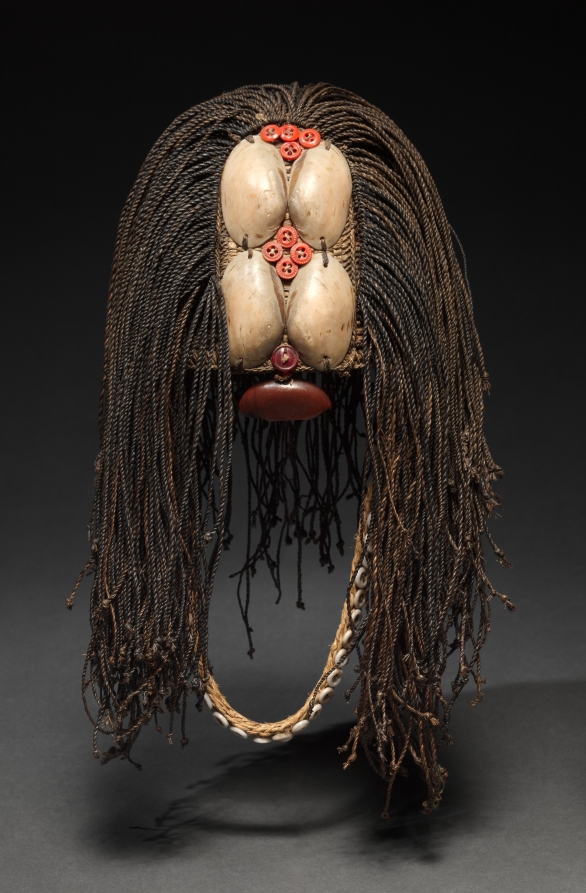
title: Man's Bwami Prestige Cap (sawamazembe)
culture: Africa, Central Africa, Democratic Republic of Congo, Lega-style maker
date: early to mid-1900s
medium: Plant fiber, seashells, seeds, pods, buttons, and probably cotton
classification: Garment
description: Among the Lega people of the eastern Democratric Republic of Congo, headgear was an important indicator of social position. Certain caps, headbands, and headdresses were the exclusive prerogative of the Bwami men's association. This headdress, called sawamazembe, was worn only by high-ranking members of this group. The hat's wig-like form represents a woman's coiffure, illustrating the blurring of gender distinctions among high-ranking Bwami members. The shell ornaments on the front suggest the moon, while buttons and a seed pod provide additional embellishment.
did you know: This prestige cap combines local organic materials and imported machine-made materials like buttons.